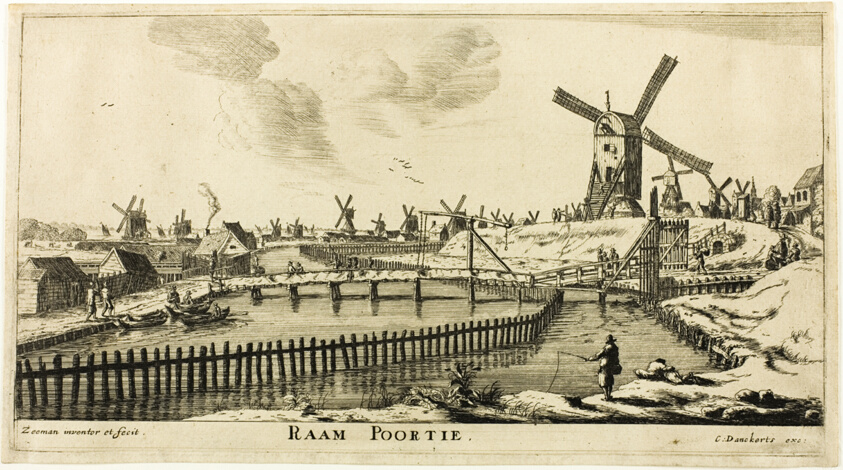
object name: Print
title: Raam Gate, from The Eight City Gates of Amsterdam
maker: Reinier Nooms, called Zeeman (Dutch, c.1623-1664)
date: c. 1654/64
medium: Etching on ivory laid paper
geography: Holland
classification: etching; print; prints and drawing